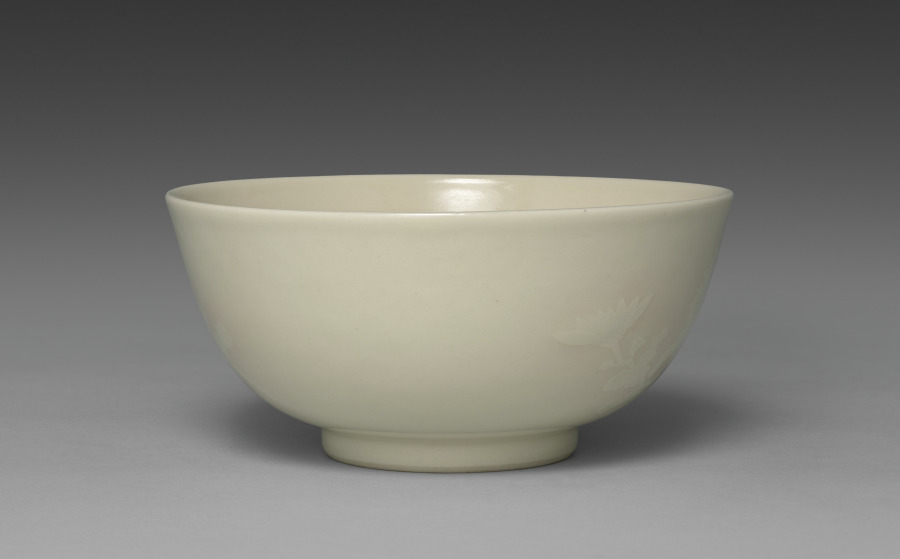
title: Sweets Bowl with Chrysanthemums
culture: Japan, Taishō period (1912–26) or Shōwa period (1926–89)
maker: Seifū Yohei IV (Japanese, 1872–1951)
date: 1914–46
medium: Porcelain with in-glaze and underglaze color and molded design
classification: Ceramic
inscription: 清風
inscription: 成山清風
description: Sweets bowls hold the confections enjoyed when drinking tea. This bowl and CMA 2022.207 offer an important lesson in appreciating Yohei IV’s ceramic practice, for while they have the same design and shape and are made with the same materials, the execution of the pieces makes them entirely different upon close inspection, thereby demonstrating the range of possible production results from a single template. Each bowl has the same composition of two different types of chrysanthemum flowers, one with long, slim, knifelike petals and the other with short, rounded, multilayered petals, shown running around its surface in low relief. The centers of the flowers are painted with yellow under the glaze. Yohei III formulated a number of new underglaze colors during his career, and this is likely one of them. The storage box lid provides abbreviated descriptions of the complex processes used in the surface decorations. It identifies the bowl inside as “Sweets dish with picture of chrysanthemum in kanpakuyū.” The box lid has on its exterior the seal reading “Seizan Seifu” 成山清風, which includes Yohei IV’s style name, but no signature. Instead, a signature is found on the interior of the box lid, accompanied by another seal, this time a gourd-shaped seal reading “Seifu.” The ink inscriptions are in a mode closer to formal script. This bowl, with the signature on the inside of the box lid, stands out for a distinctively bubble-filled glaze with a heavier pink effect, as well as more noticeable yellow at the flowers’ centers and deeper carving in the relief decoration. The design has crept much closer to the rim. A closer look at the delineation of the flower petals reveals that the designs differ at times with respect to which petals appear in front or behind others. The centers of the bases of both bowls are incised with “Seifu” in a manner matching many other works by Yohei IV, although there are slight differences. As one might expect from the other differences in the bowls, the characters on the base of the subtle bowl, CMA 2022.207, are gentler, finishing in a tapering out of the strokes. The strokes on this bold bowl end in triangular pinheads.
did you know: Here Yohei IV used his father’s kanpakuji formula, with underglaze pink for the gradated wash of color surrounding the flowers.